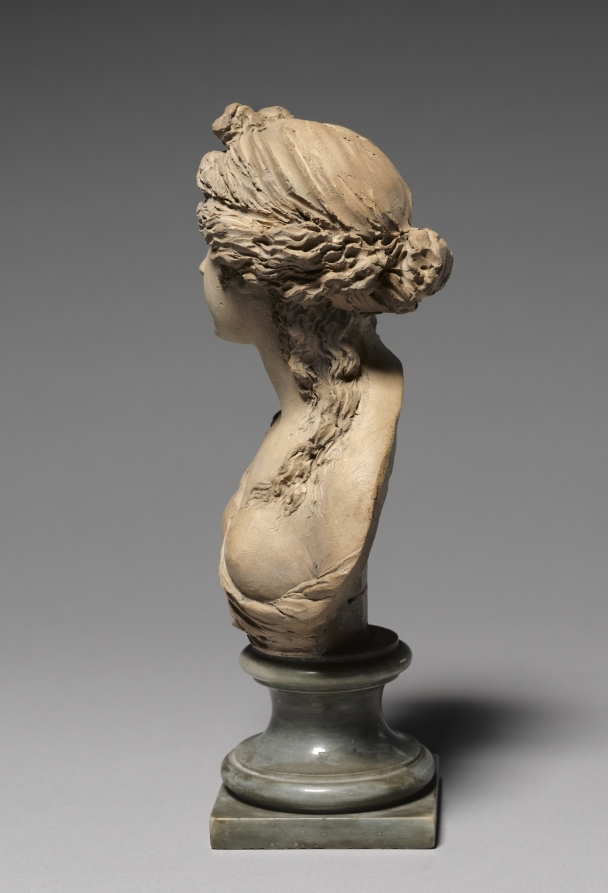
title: Bust of a Woman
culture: France, 19th century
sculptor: Joseph-Charles Marin (French, 1759–1834)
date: 1800–1834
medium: terracotta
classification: Sculpture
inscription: inscribed, back of sculpture below neck: Marin.